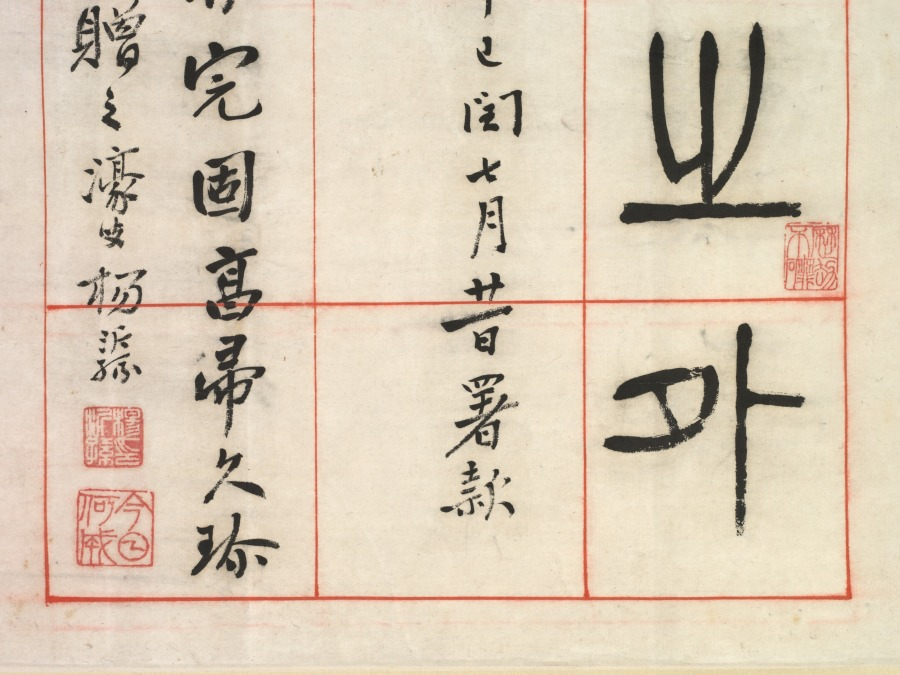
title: On Happiness, Calligraphy in Seal Script Style (zhuanshu)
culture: China, Changsu, Qing dynasty (1644-1911)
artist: Yang Yisun (Chinese, 1813–1881)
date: 1871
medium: hanging scroll, ink on paper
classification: Painting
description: Yang Yisun transcribed this ancient text on six narrow scrolls, starting at the top right and ending at the bottom left. Yang emphasizes the text’s historic nature by using the seal script style found on stone steles and bronze vessels. On Happiness features reflections of a scholar on a leisurely life in the countryside, composed by Han dynasty official Zhongchang Tong, who died the year the Han dynasty collapsed (AD 220). The idyllic life described in the text may bean evocation of the past in a time of national crisis. A decade before Yang wrote these scrolls, Anglo-French forces had looted and burned the Summer Palace in Beijing. At the same time, the domestic Taiping rebellion (1850–64), led by a religious fanatic to overthrow the Qing government, had devastated Yang’s homeland, the Jiangnan region, with an estimated 20 million lives lost.